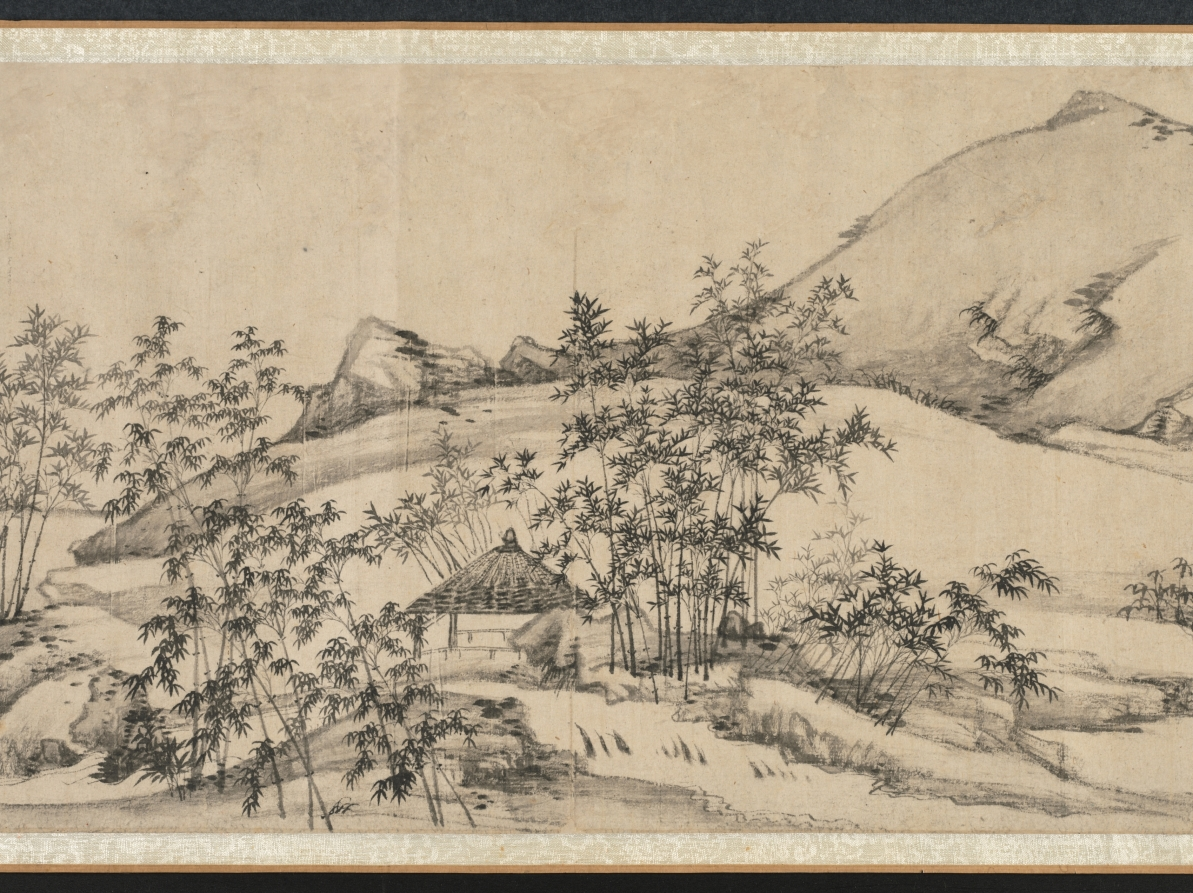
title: Landscape with Bamboo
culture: China, Yuan dynasty (1271-1368)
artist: Song Ke (Chinese, 1327–1387)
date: 1300s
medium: Handscroll; ink on paper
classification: Painting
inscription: 東吳宋克戲為仲幾畏友圖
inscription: 2 colophons and 14 additional seals: 1 seal of Yü Chung-chi (14th c.); 1 seal of Wu Ch'eng (1469 jinshi); 1 colophon and 2 seals of Wu K'uan (1435–1504); 1 colophon and 9 seals of Cheng Qi (1911–1988); 1 seal unidentified.